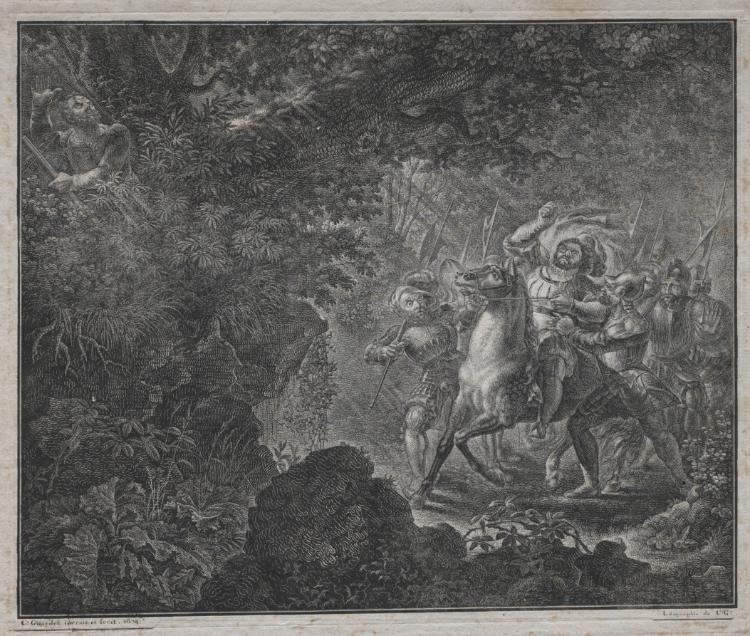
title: William Tell at Küssnacht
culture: Switzerland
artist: Charles Samuel Girardet (Swiss, 1780–1863)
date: 1820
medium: lithograph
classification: Print